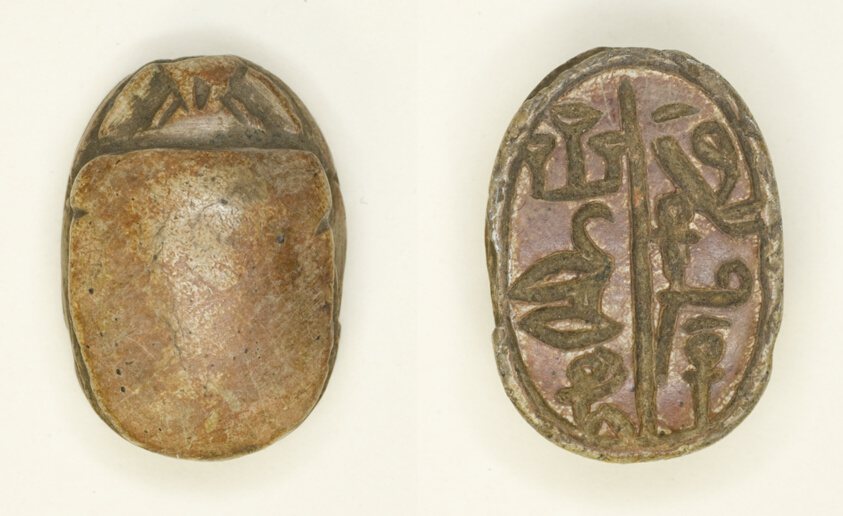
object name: Costume and Accessories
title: Scarab: Title (Seal-Bearer of the King of Lower Egypt, Overseer of Sealed Goods) and Personal Name (Har)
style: second intermediate period, egyptian, ancient, fifteenth dynasty, seventeenth dynasty, sixteenth dynasty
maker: Egyptian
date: Second Intermediate Period, Dynasties 15–17 (about 1650–1550 BCE)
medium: Steatite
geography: Egypt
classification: scarab; ancient art; costume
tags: Hieroglyphs, insects